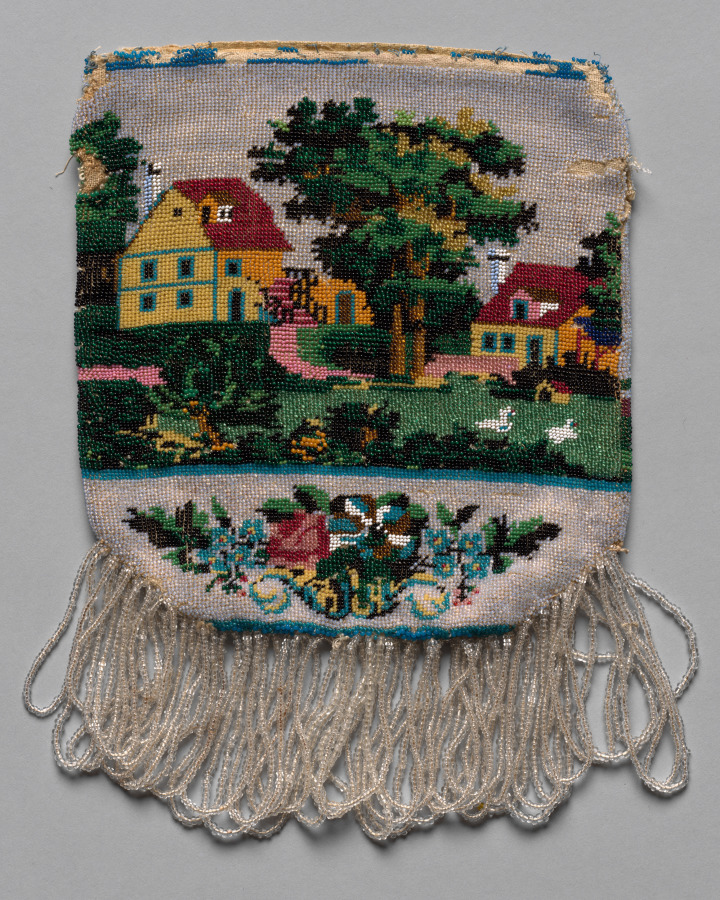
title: Beaded Bag (landscape scene)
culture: America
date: 19th century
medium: glass beads stitched individually to plain weave background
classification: Garment